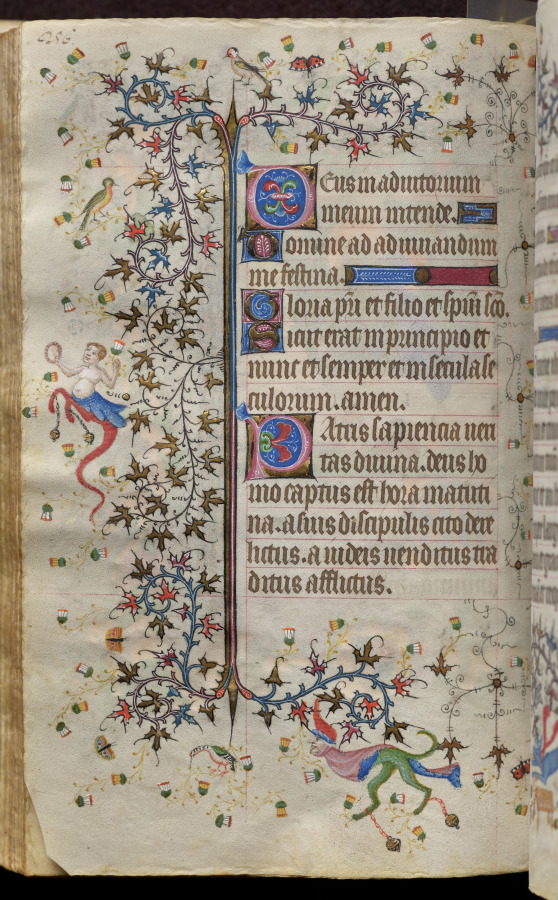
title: Hours of Charles the Noble, King of Navarre (1361-1425): fol. 128v, Text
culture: France, Paris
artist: Master of the Brussels Initials and Associates (French)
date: c. 1405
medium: ink, tempera, and gold on vellum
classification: Bound Volume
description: This precious volume was obviously highly prized by its owner, the French-born King of Navarre, who had his coat of arms painted on no less than twenty folios. Rather than directly commissioning this manuscript from a specific workshop, it seems that Charles the Noble acquired his book of hours -- perhaps ready-made for the luxury market -- while on a trip to Paris in 1404-05. A collaborative effort, six painting styles are evidenced within the pages of this codex, those of two Italians, two Frenchmen, and two Netherlanders. The painter who was responsible for the planning and decoration of the book, and who produced seventeen of the large miniatures, was a Bolognese artist known as the Master of the Brussels Initials. His principal assistant, responsible for most of the borders, was a Florentine who signed his name "Zecho" da Firenze on folio 208 verso.